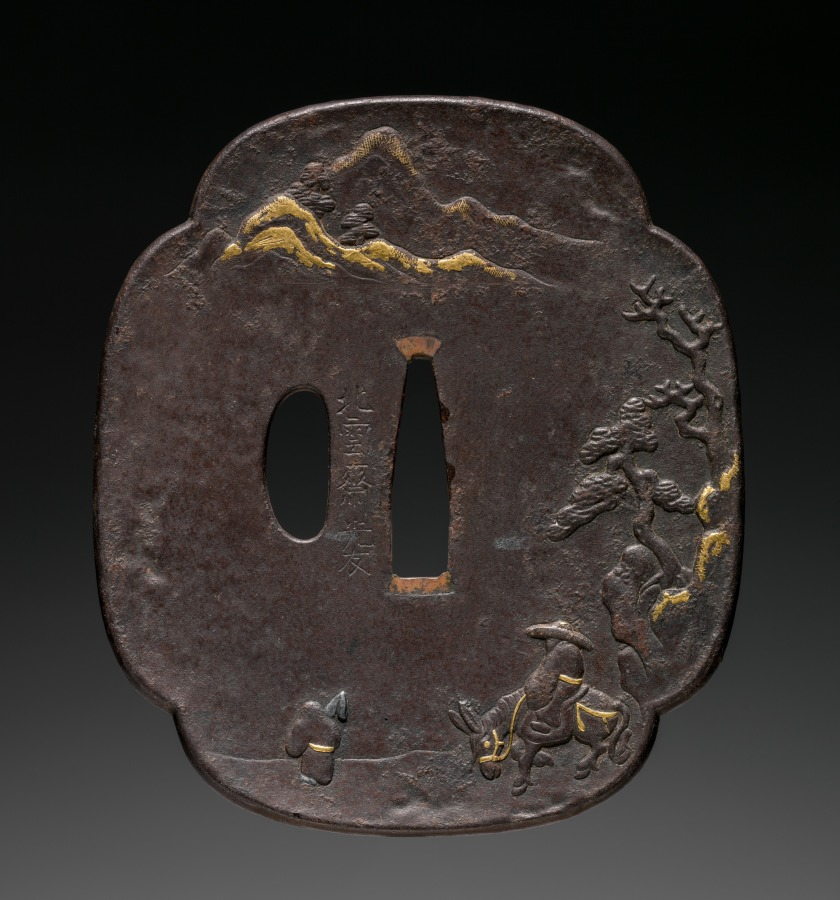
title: Sword Guard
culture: Japan, Edo period (1615–1868)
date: mid-1800s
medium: iron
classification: Arms and Armor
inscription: Signature: Hokuunsai Mitsutomo